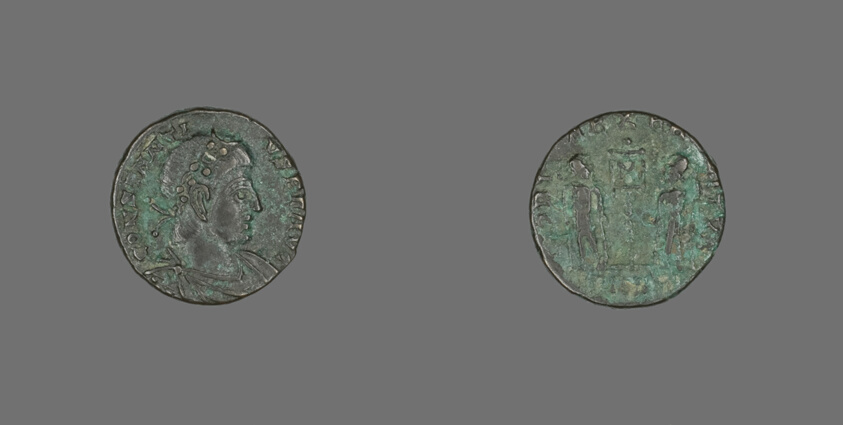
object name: Coin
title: Coin Portraying Emperor Constantius II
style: roman (ancient, style or period), ancient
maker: Roman, minted in Trier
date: after 340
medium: Bronze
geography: Roman Empire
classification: coin; ancient art